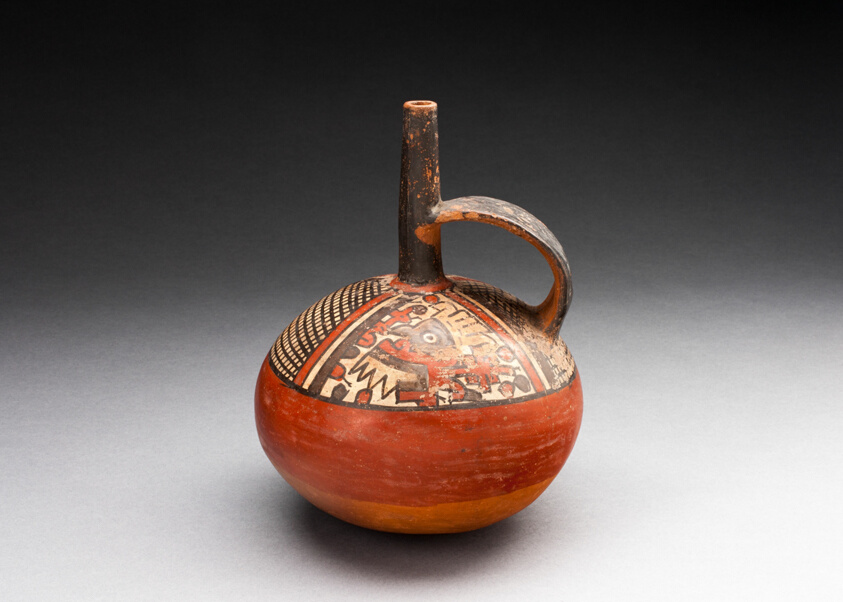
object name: Vessel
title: Single-Spout Vessel Depicting an Abstracted Figure and Net Pattern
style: tiahuanaco, middle horizon, Pre-Columbian, americas, Arts of the Americas, andean, andes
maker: Tiwanaku-Wari; South coast Peru or northern Bolivia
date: 180 BCE–500 CE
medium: Ceramic and pigment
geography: Bolivia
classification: earthenware; ceramics; vessel; art of the americas